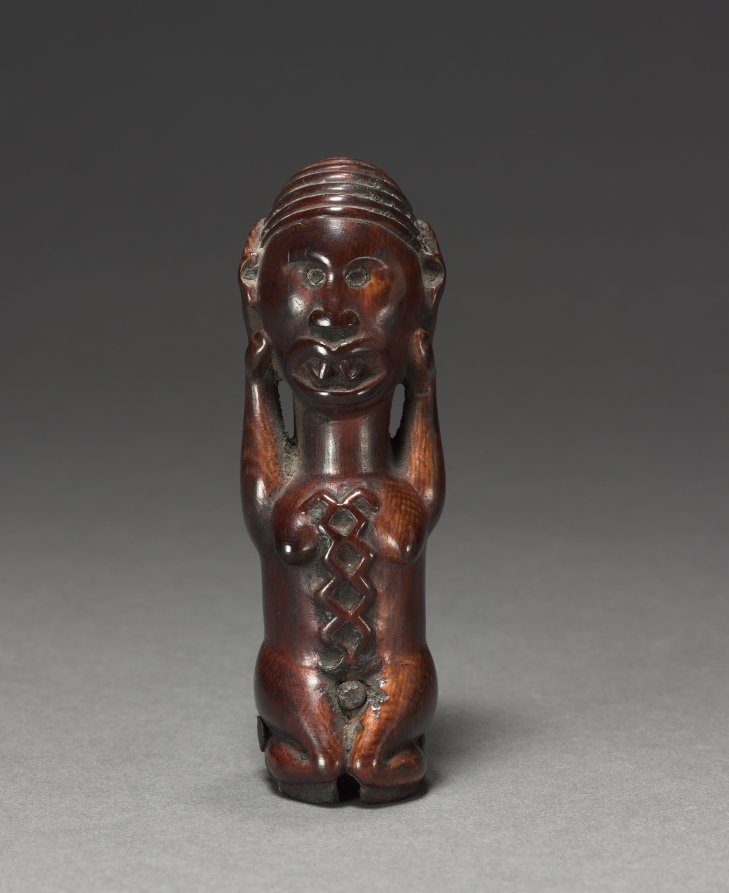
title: Female Figurine or Finial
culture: Central Africa, Democratic Republic of the Congo (most likely), Cabinda, or Republic of the Congo, Kongo people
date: late 1800s-early 1900s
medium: Ivory and iron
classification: Sculpture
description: This ivory figurine most likely served as the finial of a wooden staff or scepter, and owned and used by a high-ranking official or a ritual specialist. The combination of its features is quite unusual. The kneeling attitude is rather common and typically denotes respect. However, the position of the hands is anatomically incorrect with the thumbs toward the face. The idea of the striking hand gesture may refer to mourning.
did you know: The oversized hands with elongated fingers are positioned in an anatomically incorrect manner with the thumbs toward the face.